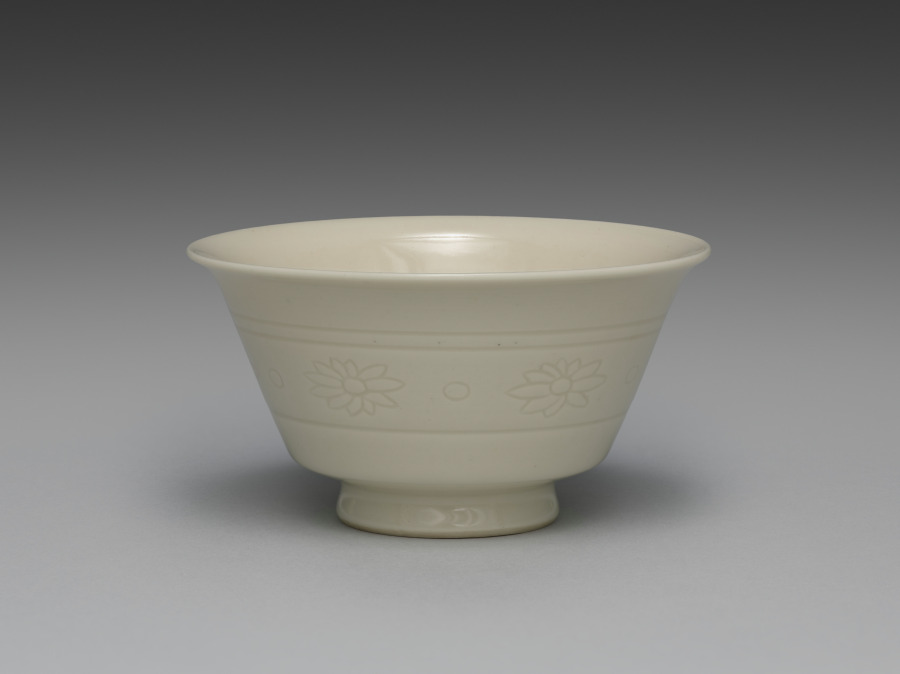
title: Teacup from Teacups with Floral Band Motif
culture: Japan, Meiji period (1868–1912)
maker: Seifū Yohei III (Japanese, 1851–1914)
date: 1893–1914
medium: One from a set of five cups; porcelain with incised decoration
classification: Ceramic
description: The five sencha teacups in this set are decorated with incised flowers and dots between a double band at the top and a single band at the bottom. They are in Yohei III’s creamy taihakuji body and glaze. In their motifs, they are quite similar to an incense burner by Yohei III (see CMA 2022.180), but the flowers are even more simple in design, with no open circle at the center. A label affixed to the side of the box refers to them as “sencha cups in emulation of Korean white [ware].” The reference to Korean ware indicates that even though Yohei was more directly inspired by Qing-dynasty wares from the Dehua kilns in Fujian Province in developing his porcelain clay and glaze for works such as these, the general understanding of the continental models still placed them, at least in terms of color, among pieces broadly associated in Japan with Korean white wares. The delicate cups are thinly potted, so they have a highly desirable translucency.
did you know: The delicate cups in this set are thinly potted, so they have a highly desirable translucency.